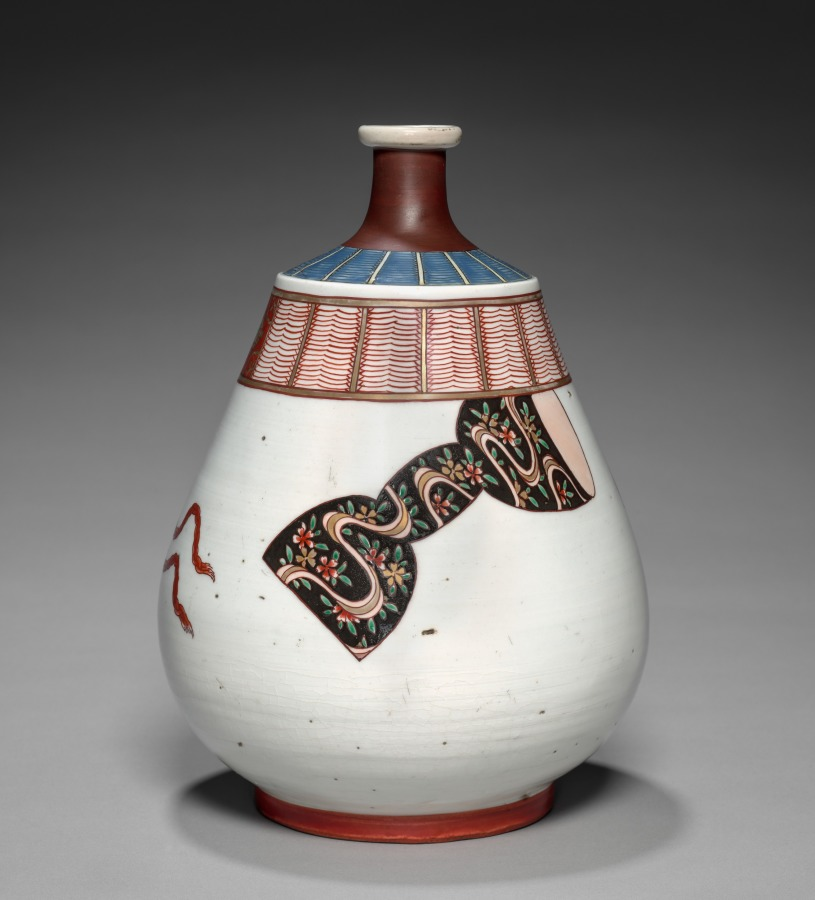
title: Bottle-Flask with Drums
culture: Japan, Edo period (1615–1868)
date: 1700s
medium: porcelain with overglaze color enamel (Hizen ware, Arita type, Imari style)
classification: Ceramic